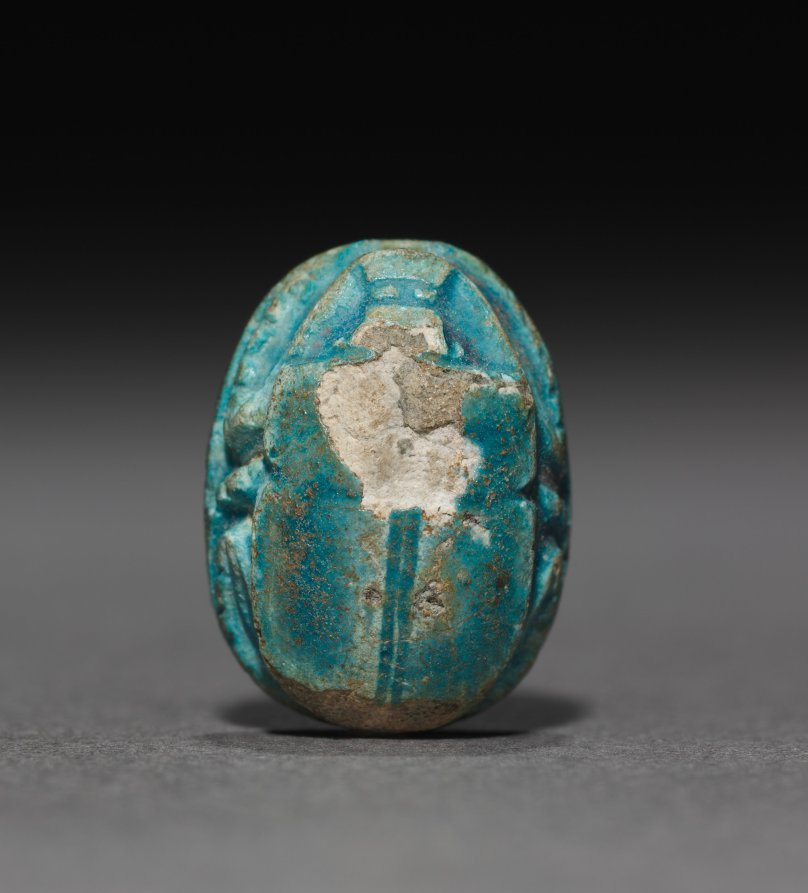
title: Scarab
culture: Egypt, Middle Kingdom (2040–1648 BCE), Dynasty 13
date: 1901–1648 BCE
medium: turquoise-glazed steatite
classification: Scarabs